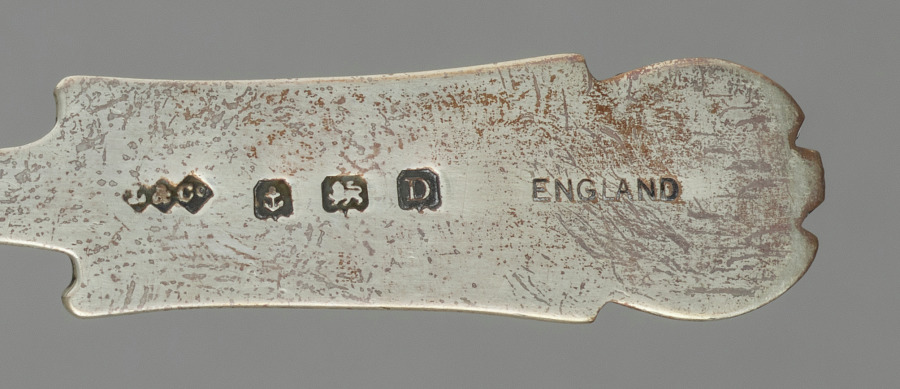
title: Set of six Spoons in Original Box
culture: England, London, 19th century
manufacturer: Liberty and Company (British)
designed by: attributed to Archibald Knox (British, 1864–1933)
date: c. 1895–1910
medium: Silver, enamel decoration and leather box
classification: Silver